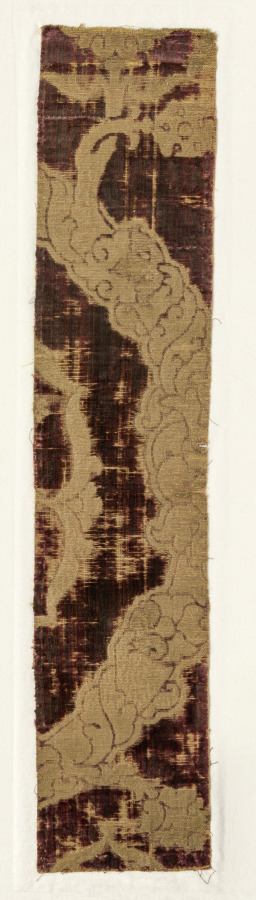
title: Fragments from Chasuble Front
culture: Italy, early 16th century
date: early 1500s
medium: velvet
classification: Velvet